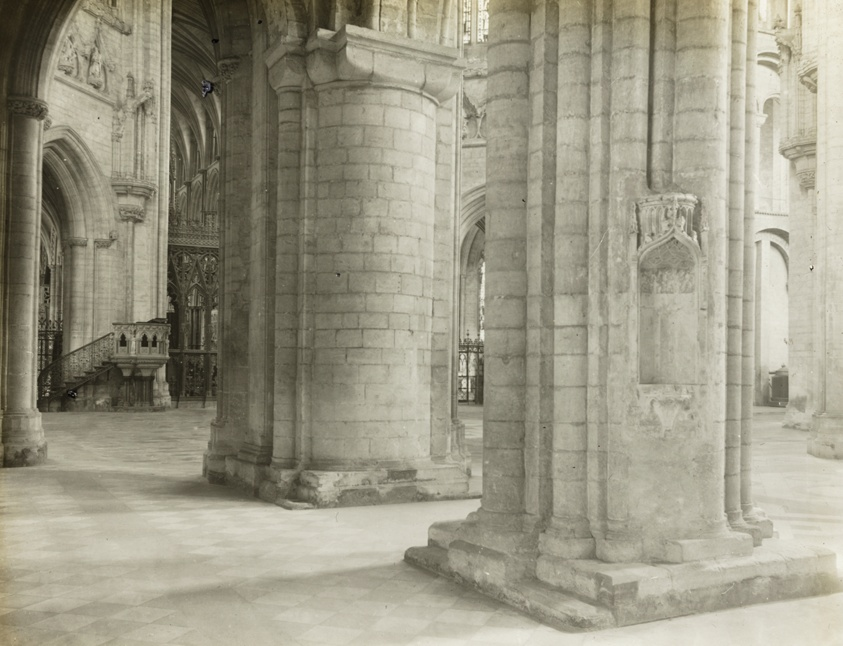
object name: Photograph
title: Ely Cathedral: Nave and Octagon, to Choir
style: Pictorialism, 19th century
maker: Frederick H. Evans (English, 1853–1943)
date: c. 1891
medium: Lantern slide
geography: England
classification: photograph; photography